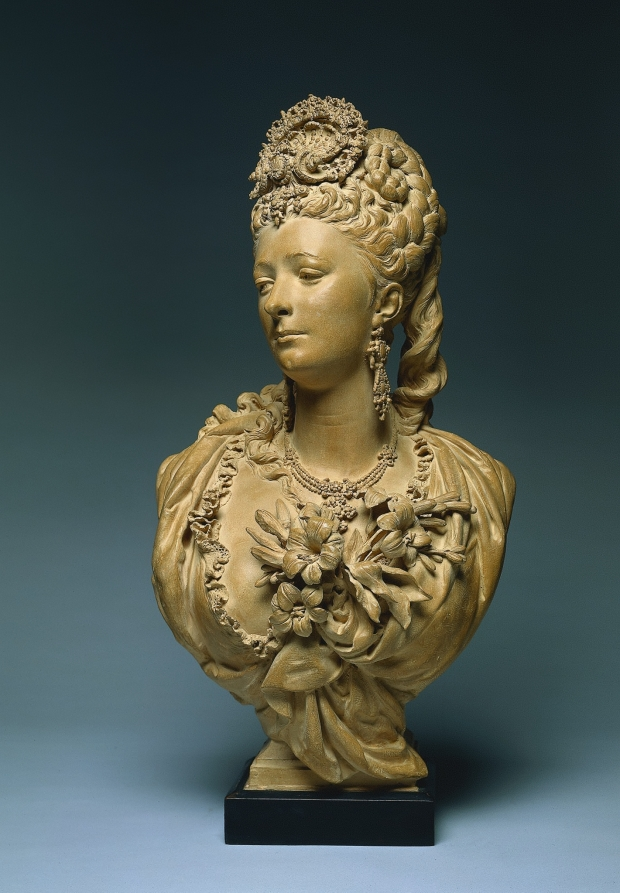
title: Portrait Bust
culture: France, 19th century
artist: Albert-Ernest Carrier-Belleuse (French, 1824–1887)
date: c. 1865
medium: terracotta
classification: Sculpture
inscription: incised in the clay on the back: "A. Carrier"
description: Among the artists who reacted against the static poses of neoclassical art, Carrier-Belleuse drew inspiration from the opulence and excess of Rococo portraiture of the 1700s. This bust resembles one of Napoleon III's mistresses, Marguerite Bellanger, whose features the artist is known to have borrowed for his female busts. Carrier-Belleuse received commissions from Napoleon III, ruler of France from 1852 to 1870, and contributed to the sculptural decorations of the Louvre and Opera Garnier in Paris.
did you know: The possible muse for this bust, Virginia Oldonia, was a countess know for her drama and costumes.